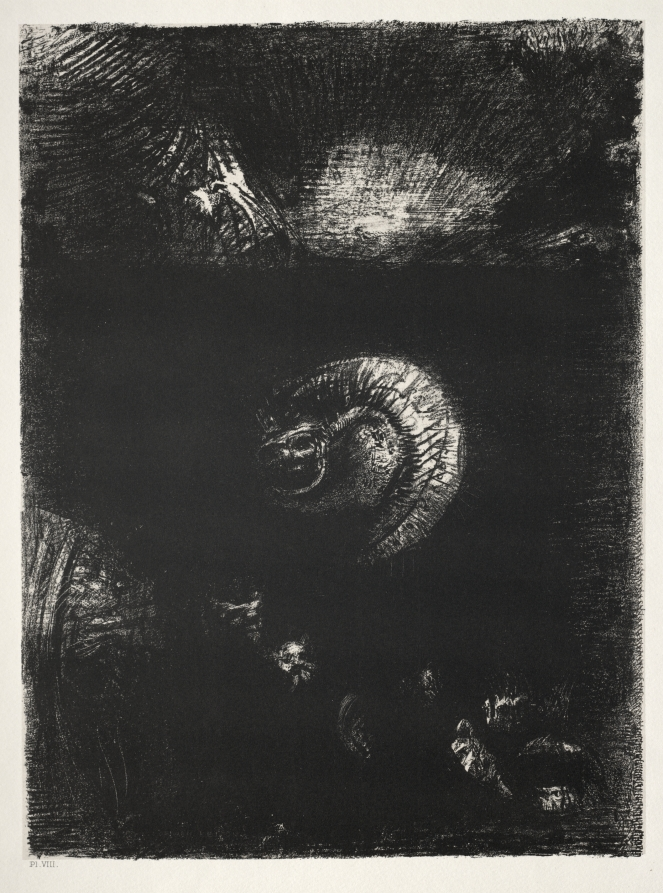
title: And All Manner of Frightful Creatures Arise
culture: France, 19th century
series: The Temptation of Saint Anthony (First Series)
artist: Odilon Redon (French, 1840–1916)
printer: Becquet (French)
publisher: Edmond Deman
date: 1888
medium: lithograph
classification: Print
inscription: printed at lower left, below image: Pl. VIII. / Et toutes sortes de bêtes effroyables surgissent.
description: This portfolio is one of three made by Odilon Redon inspired by avant-garde writer Gustave Flaubert’s novel The Temptation of Saint Anthony (1874). Captivated by the book’s fantastical account of moralizing tests encountered by a hermit in the desert, Redon executed charcoal drawings and attempted to evoke that medium’s dense blackness in his lithographs. Based on the text’s darkly imaginative tone rather than its actual content, the works in this series present invented monsters and figures in otherworldly settings with jarring tonal variations. Although Redon felt that the prints effectively translated the surreal universe of his source material, they were largely misunderstood in his own time.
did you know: Publisher Edmond Deman commissioned this portfolio after he saw an 1886 exhibition of Redon's work in Brussels, Belgium.